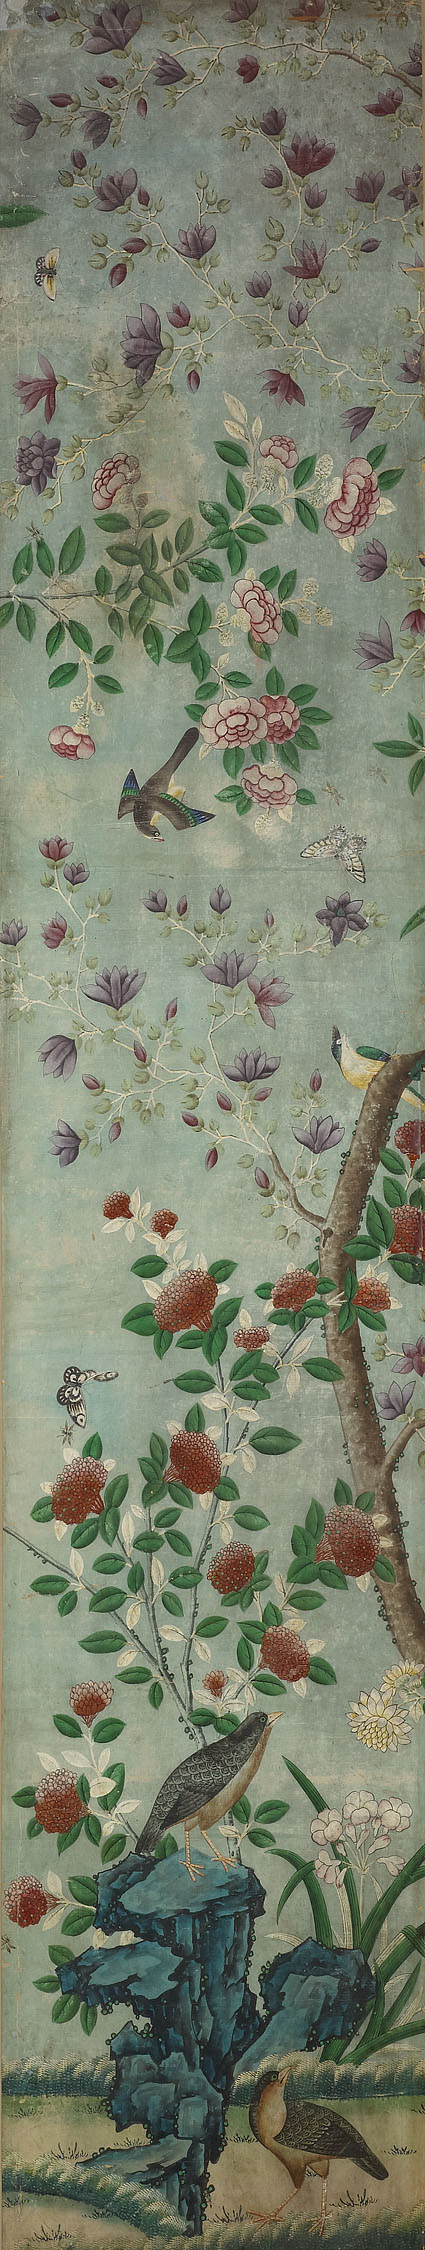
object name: Coverings and Hangings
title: Wall Panel: Birds and Flowers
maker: France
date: 1800/25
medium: Hand-painted paper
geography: France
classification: wallpaper; paper; european decorative arts